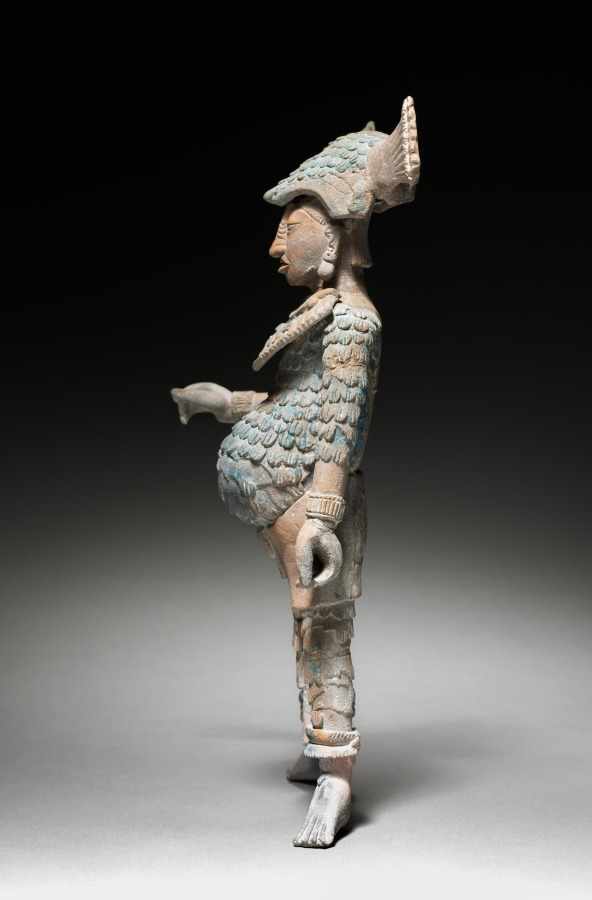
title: Warrior Figurine with Removable Headdress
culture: Mexico, Yucatán, Jaina Island region, Campeche, Maya style (250-900)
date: 600–900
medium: earthenware with pigment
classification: Sculpture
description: The major offerings placed in the Maya graves of Jaina Island were ceramic figurines, some of Mesoamerica's finest, that depict deities and humans in a variety of roles. This warrior, his headdress removable, once probably held weapons and wears either quilted cotton armor or the feathered uniform of a military order. We don't know why such figures are often pot-bellied.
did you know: Maya blue pigment was made by combining clay with indigo in a complex technique developed around the ninth century.